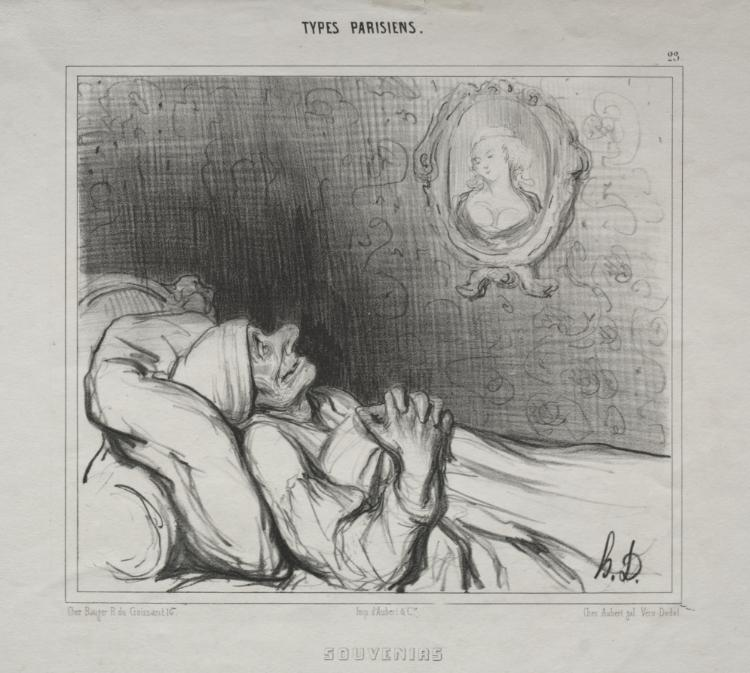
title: Memories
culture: France, 19th century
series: Parisian Types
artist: Honoré Daumier (French, 1808–1879)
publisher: Aubert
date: 1840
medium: lithograph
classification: Print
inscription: Upper margin, pencil: HD 401 ; lower margin, printed: Chez Bauger R. du Croissant 16 / Imp. d'Aubert & Cie / Chez Aubert gal. Vèro-Dodat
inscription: Above image, printed: TYPES PARISIENS. / 23 ; below image, printed: SOUVENIRS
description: This print was first published in the journal La Caricature (May 10, 1840) as plate 23 from the series Parisian Types; it was later re-published in Le Charivari (January 5, 1842).